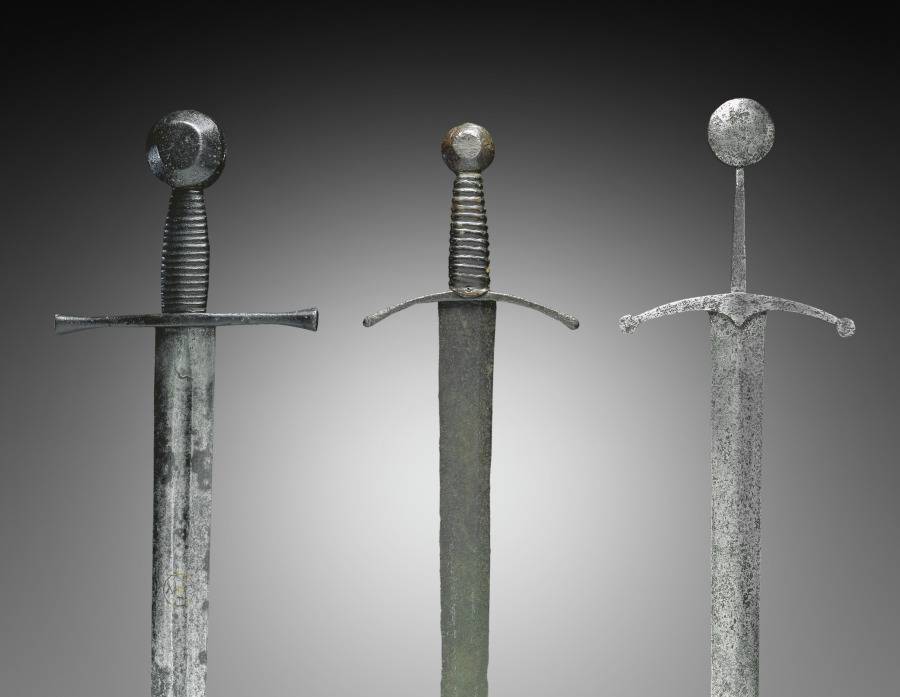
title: Sword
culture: European (unassigned), 15th century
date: 1400s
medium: steel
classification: Arms and Armor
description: The European sword is derived from the ninth-century Viking sword, which consisted of a straight double-edged blade and was suitable for slashing or thrusting. Throughout the medieval period swords became increasingly specialized weapons depending on whether it was intended to be used on horseback or on foot. A knight likely owned several swords according to his needs and preferences. Craftsman sought to achieve the technical superiority that in turn would provide his client with a distinct advantage.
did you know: Although now lost, this sword would have had a scabbard or sheath made of wood covered in leather to protect it from water so it wouldn't rust when not in use.